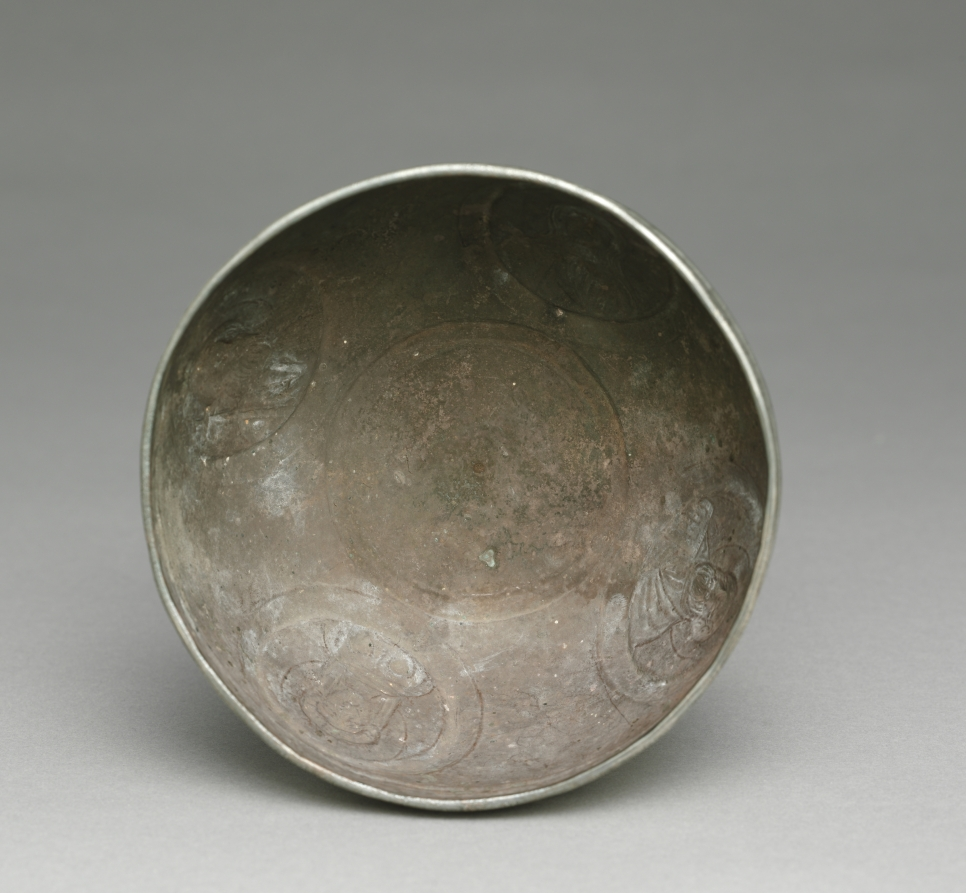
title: Chalice from the Beth Misona Treasure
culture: early Byzantium, Constantinople or Syria, Byzantine period, 6th-7th Century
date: c. 500–700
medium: silver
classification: Metalwork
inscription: the Greek inscription at the top, under an engraved line translates as: + The priest, KYRIAKOS, son of DOMNOS, (gave this chalice) to St. Sergios, in the time of Zeno the priest.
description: These four liturgical silver vessels—a paten and three chalices (1950.378–81)—form what is now called the Beth Misona Treasure, named for the village in northern Syria for which the objects were made. While nothing is known about the exact location and circumstances of the treasure's discovery, the people of the village of Beth Misona were, like other Christian communities in Syria and Palestine, probably forced to bury their church silver to hide it from the Persians or Arabs, who conquered their lands in the first half of the 600s. The paten, which held pieces of Eucharistic bread used during Mass, is decorated with an engraved Latin cross surrounded by a dedicatory inscription that names the paten's donor—Domnos—and its original location, the church of Saint Sergios in Beth Misona. The chalices, which contained the Eucharistic wine used during Mass, feature broad cups decorated with portrait busts of Saints Peter and Paul, Christ, and the Virgin. One chalice bears a dedicatory inscription naming its donor—Kyriakos, Domnos's son—and the priest of the church that received the pious gift—Zeno.